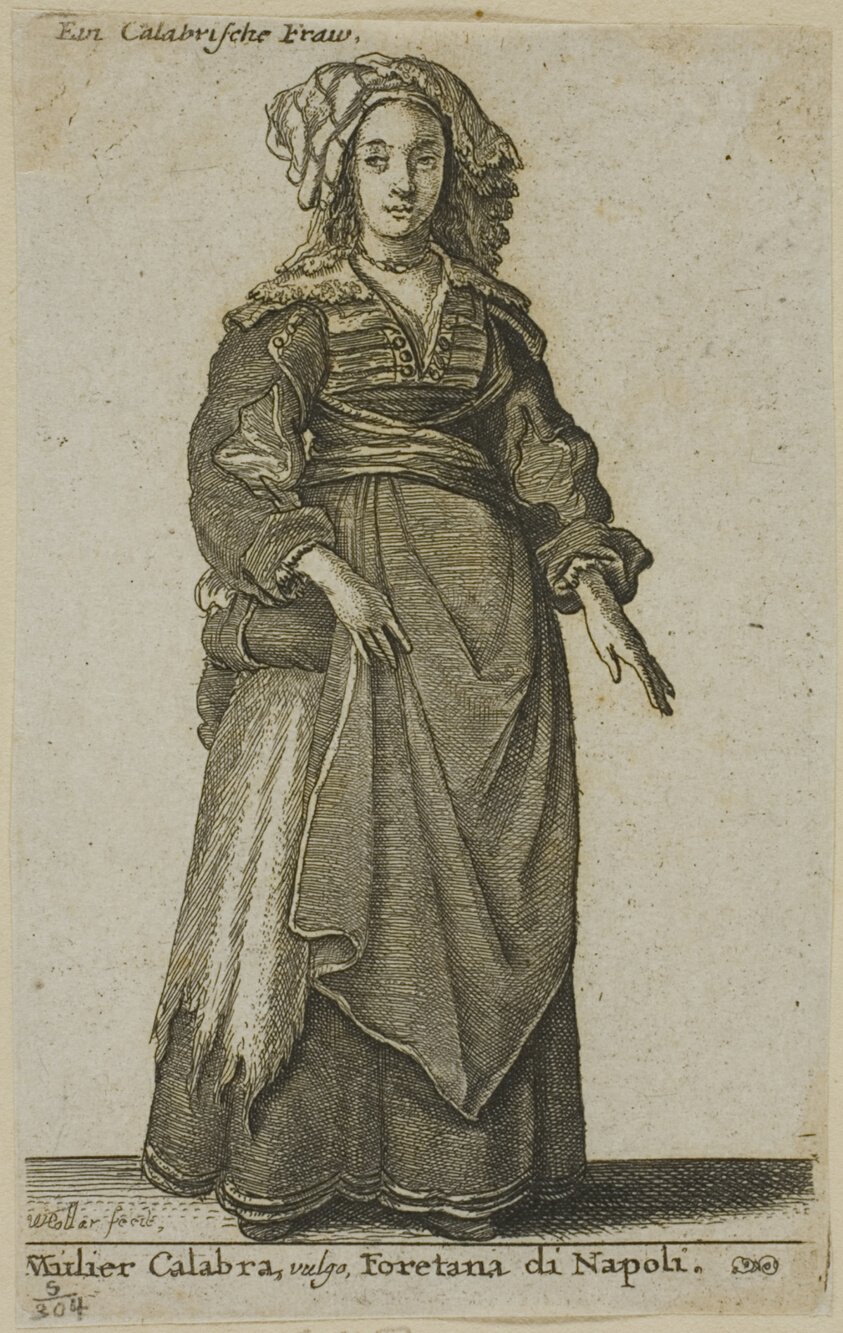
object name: Print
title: Woman of Calabria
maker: Wenceslaus Hollar (Bohemian, 1607-1677)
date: 1644–50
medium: Etching on gray China paper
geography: Bohemia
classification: etching; print; prints and drawing